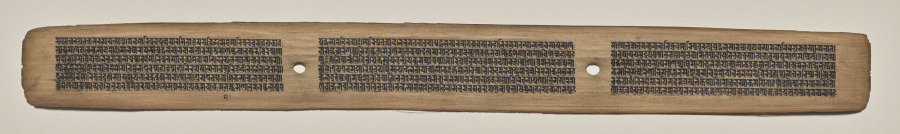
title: Text, Folio 65 (recto), from a Manuscript of the Perfection of Wisdom in Eight Thousand Lines (Ashtasahasrika Prajnaparamita-sutra)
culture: Eastern India, Bihar, Vikramashila Monastery. Painting: Nepal, Kathmandu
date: Sunday, September 14, 1119 (year 239 of the Newar Samvat in the month of Ashvina)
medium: gum tempera and ink on palm leaves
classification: Painting